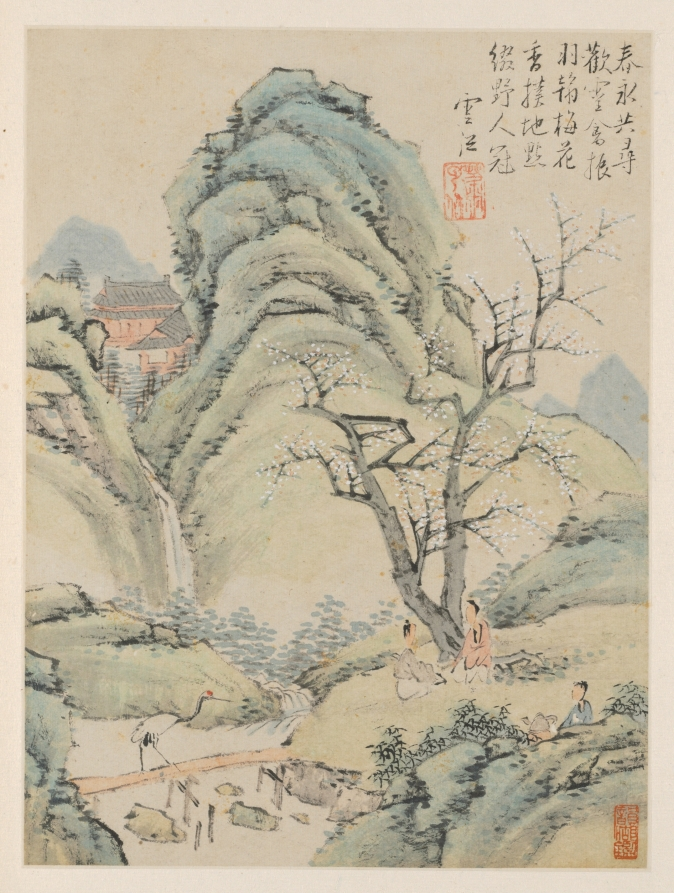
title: Album of Seasonal Landscapes, Leaf A (previous leaf 4)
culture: China, Qing dynasty (1644-1911)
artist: Xiao Yuncong (Chinese, 1596–1673)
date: 1668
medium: album leaf; ink and light color on paper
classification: Painting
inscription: Artist's inscription, signature, and 8 seals: Leaf D. In this perpetual spring, together we search out pleasure/ While lively birds flap their feathers./ The fragrance of the prunus strikes the ground;/ Its blossoms adorn the caps of rustics. Yuncong [seal] Xiao Yuncong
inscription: 9 additional seals: 2 of Chen Yixi 陳奕禧 (1646-1709); 4 of Li Yufen 李玉棻 [Li Yunhu 李韵湖] (active mid-1800s); 3 unidentified.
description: Throughout his lifetime, Xiao Yuncong visited Nanjing and Yangzhou, cities embedded in the fertile and water-rich Jiangnan region, as reflected in his paintings. Xiao painted from nature, and his landscapes are informed by the seasons and his travels, as well as by his experience as a print designer. Xiao’s fresh, light colors continue to appear in later Shanghai school paintings. This album was formerly in the collection of Li Yufen in Yangzhou and then owned by Wu Hufan in Shanghai. While the artist impressed his seal consistently below his poetic inscriptions in the upper parts of the composition, the red seals on the margins and in the lower corners of the paintings are impressions by the album’s previous owners.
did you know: The plum blossoms identify this painting as early spring.